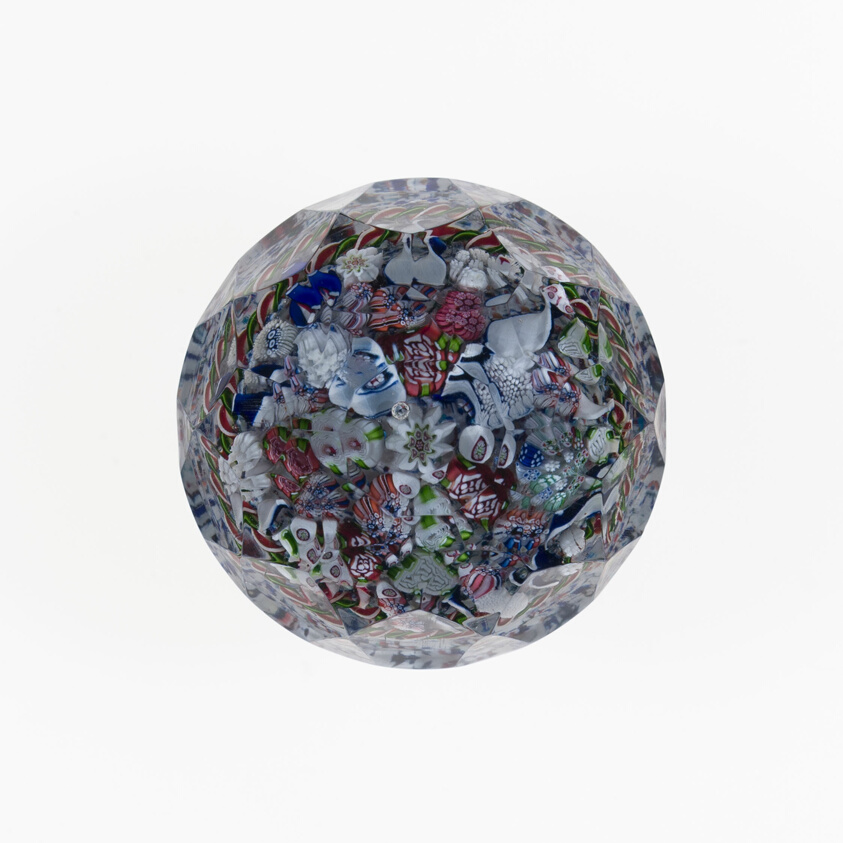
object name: Glass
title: Paperweight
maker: Possibly French or Bohemian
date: c. 1845–60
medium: Glass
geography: France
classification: paperweight; glass